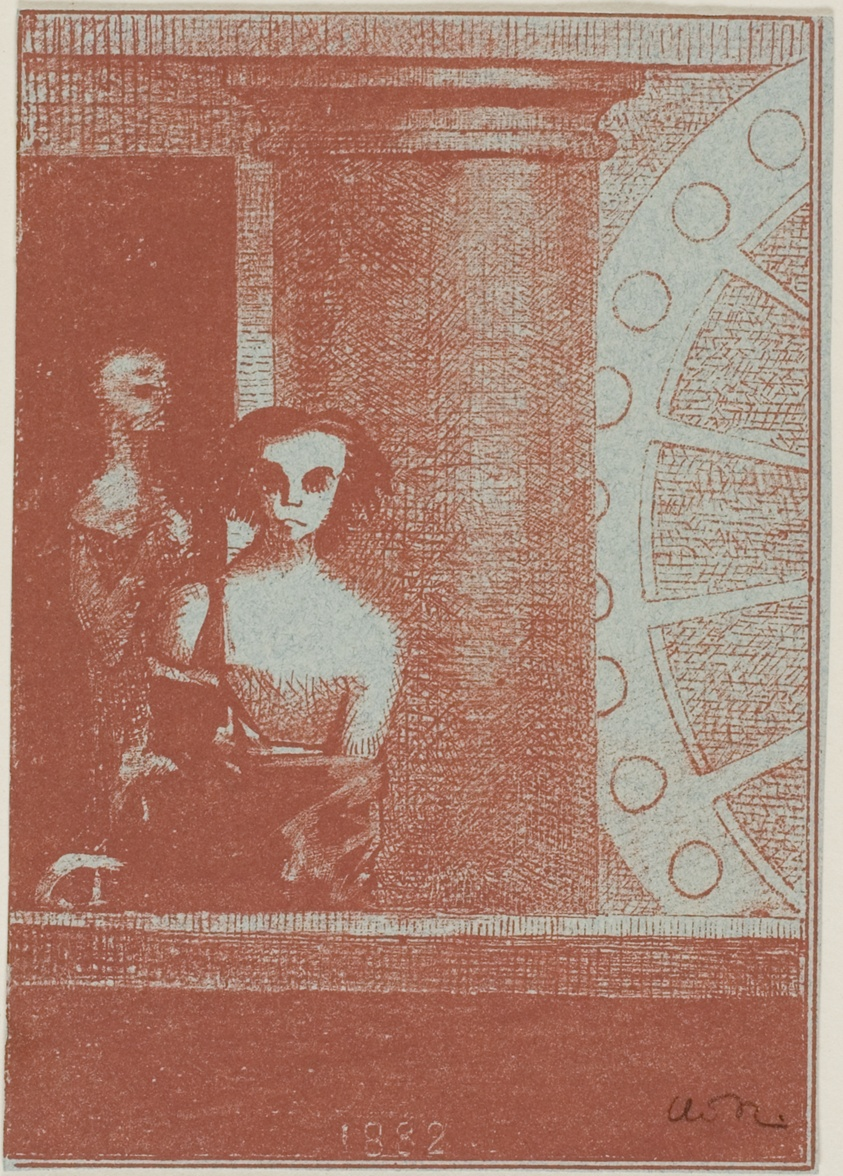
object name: Print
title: Cover/Frontispiece: verso of the second page, from To Edgar Poe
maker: Odilon Redon (French, 1840-1916)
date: 1882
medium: Lithograph in brick red on light blue wove paper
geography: France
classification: lithograph; print; prints and drawing; paper